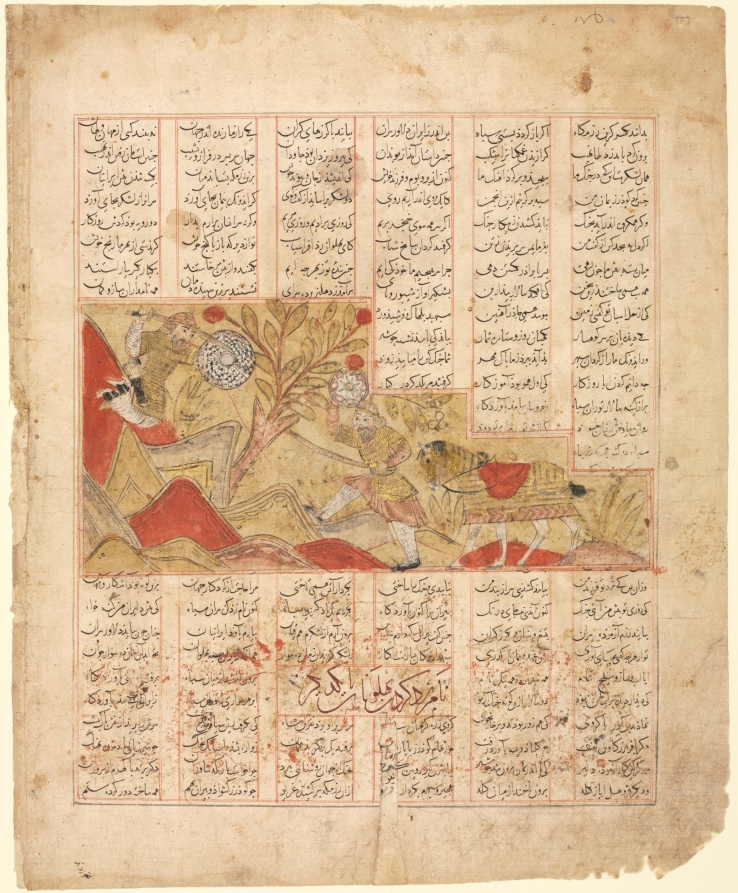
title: The Tale of the Twelve Faces. "The Warriors Engage in Combat": Illustration from the Firdausi Shahnama (verso)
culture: Iran, Shiraz, Inju Period (Il-Khanid), 14th Century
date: 1341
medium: opaque watercolor and ink on paper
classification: Manuscript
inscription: Script: Naskh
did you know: The combat scene is enclosed within a step-shaped frame.